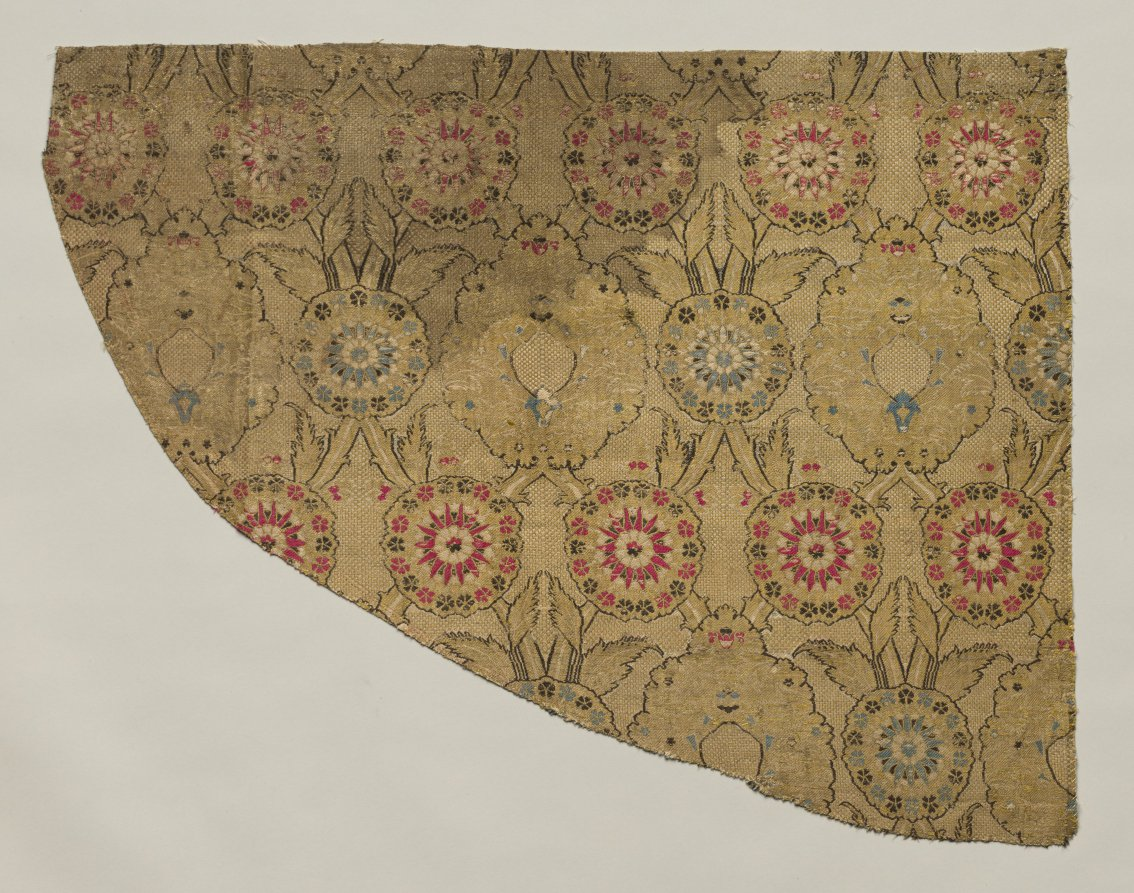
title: Lampas with double ogival floral pattern on checkered ground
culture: Turkey, Istanbul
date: 1550–1575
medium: lampas: silk and gilt-metal thread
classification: Textile